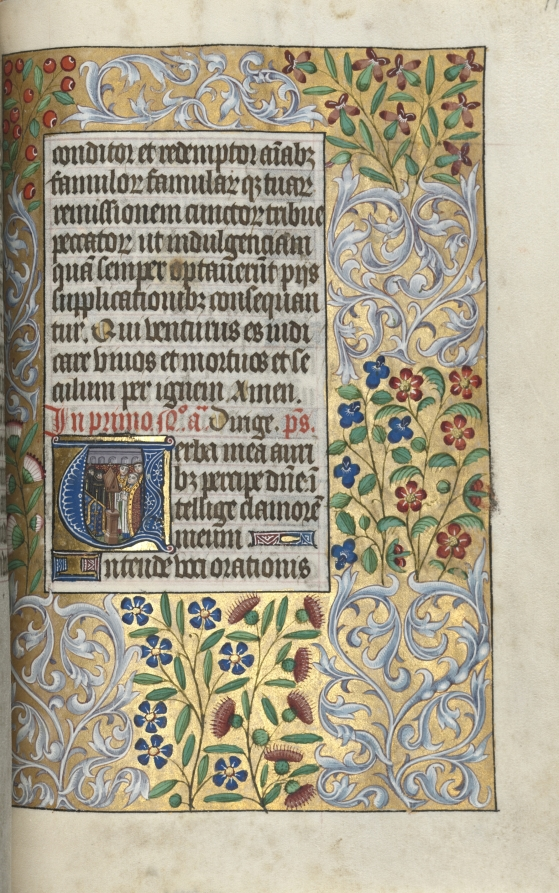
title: Book of Hours (Use of Rouen): fol. 110r, Opening of the Office for the Dead, Mass for the Dead in Initial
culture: France, Rouen, 15th century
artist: Master of the Geneva Latini (French, active Rouen, 1460–80)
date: c. 1470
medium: ink, tempera, and gold on vellum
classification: Bound Volume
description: In the late 1400s and early 1500s Rouen was an established and important center of book production. The city’s cathedral had a wealthy chapter that spent large sums of money to commission books and to maintain its extensive library. The stationers and booksellers would have likely been concentrated in or near the cathedral precinct. This artist, named after a manuscript now in Geneva, was Rouen’s principal illuminator during the second half of the 1400s.